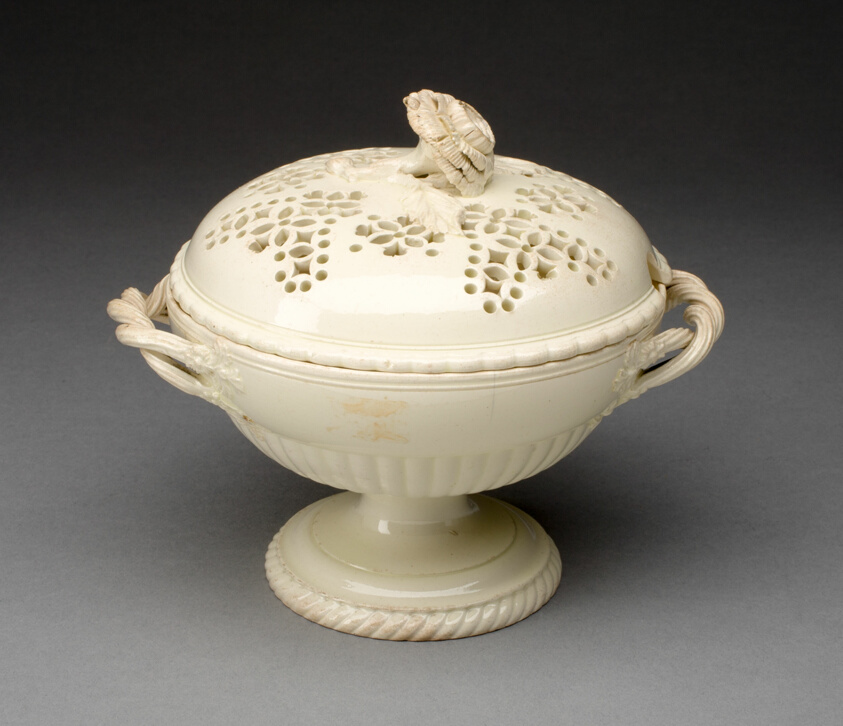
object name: Ceramics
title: Cream Bowl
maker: England, Staffordshire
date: 1780/1800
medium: Lead-glazed earthenware (creamware)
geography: Staffordshire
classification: vessel for serving food; earthenware; dish (vessel); ceramics; european decorative arts; creamware; lead-glazed earthenware